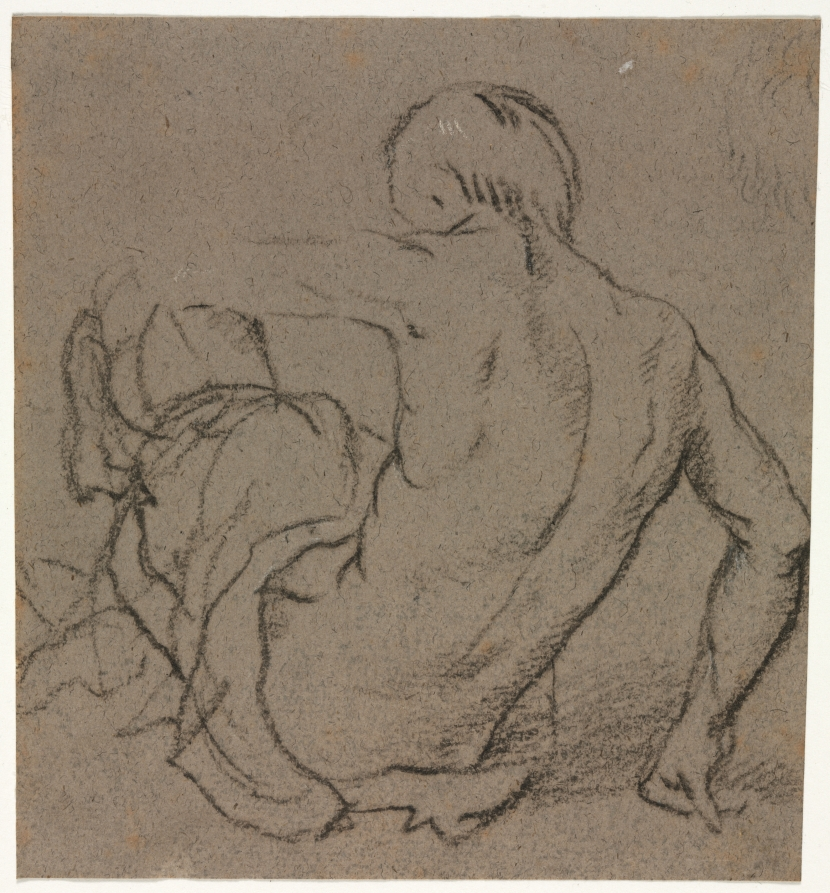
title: Man Seated on the Ground, Seen from Behind (recto)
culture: Italy, 16th century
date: 1500s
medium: brush and black wash heightened with traces of white gouache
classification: Drawing